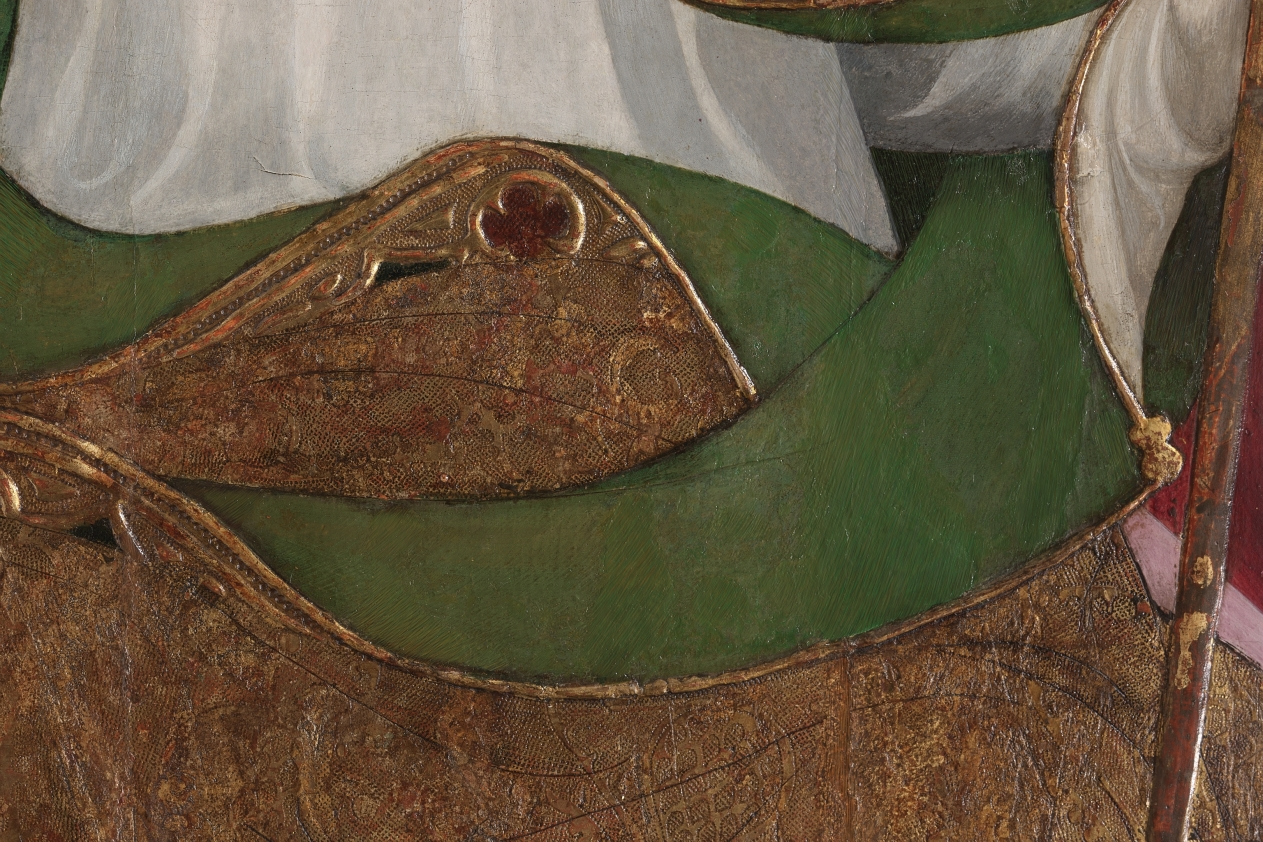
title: A Bishop Saint with a Donor (Saint Louis of Toulouse?)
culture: Spain, Catalonia, early 15th century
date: early 1400s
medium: tempera with raised and gilded gesso on wood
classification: Painting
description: The style of this painting suggests that it comes from Catalonia in northeastern Spain, though the identity of its artist remains unknown. The painting represents a youthful bishop-saint identifiable by a bishop’s symbols of authority, his miter and crozier. He wears rich vestments. Below, the figure in black represents the donor of the painting—likely a wealthy layperson rather than a cleric. The identity of the saintly bishop is speculated to be Saint Louis, Bishop of Toulouse, on the basis of his youth. Louis was consecrated Bishop of Toulouse in 1297, died six months later at the age of 23, and was canonized in 1317. His relics were moved in 1423 to Valencia and his cult flourished in Spain.